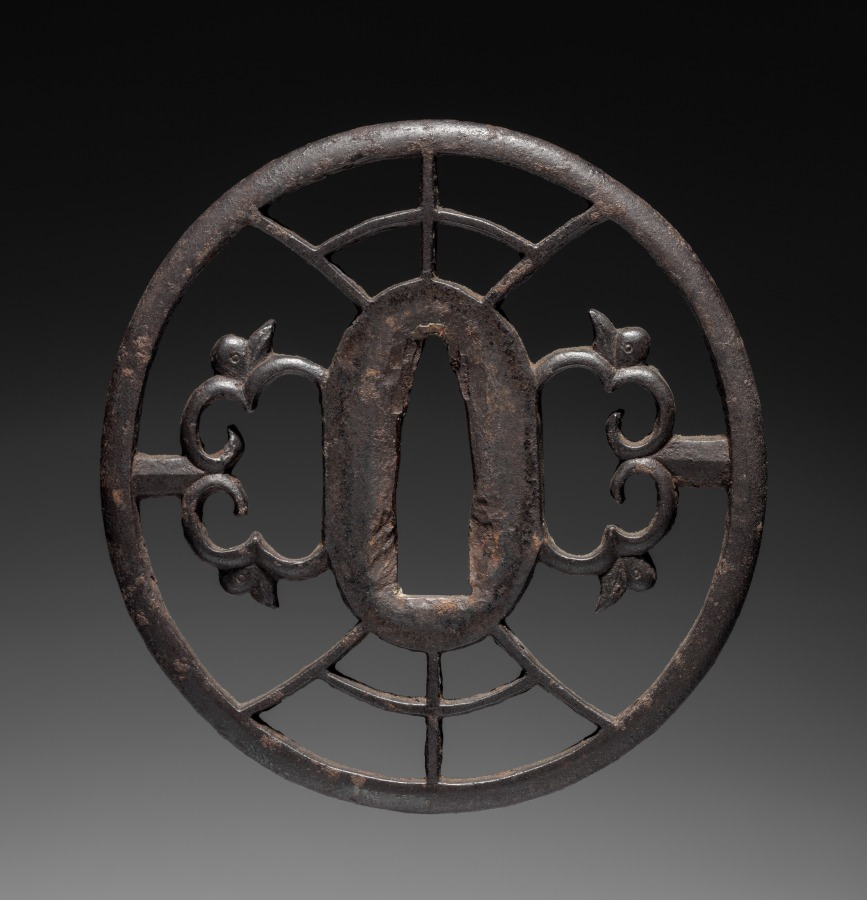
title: Sword Guard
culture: Japan, Edo period (1615–1868)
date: 1615–1868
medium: iron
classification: Arms and Armor